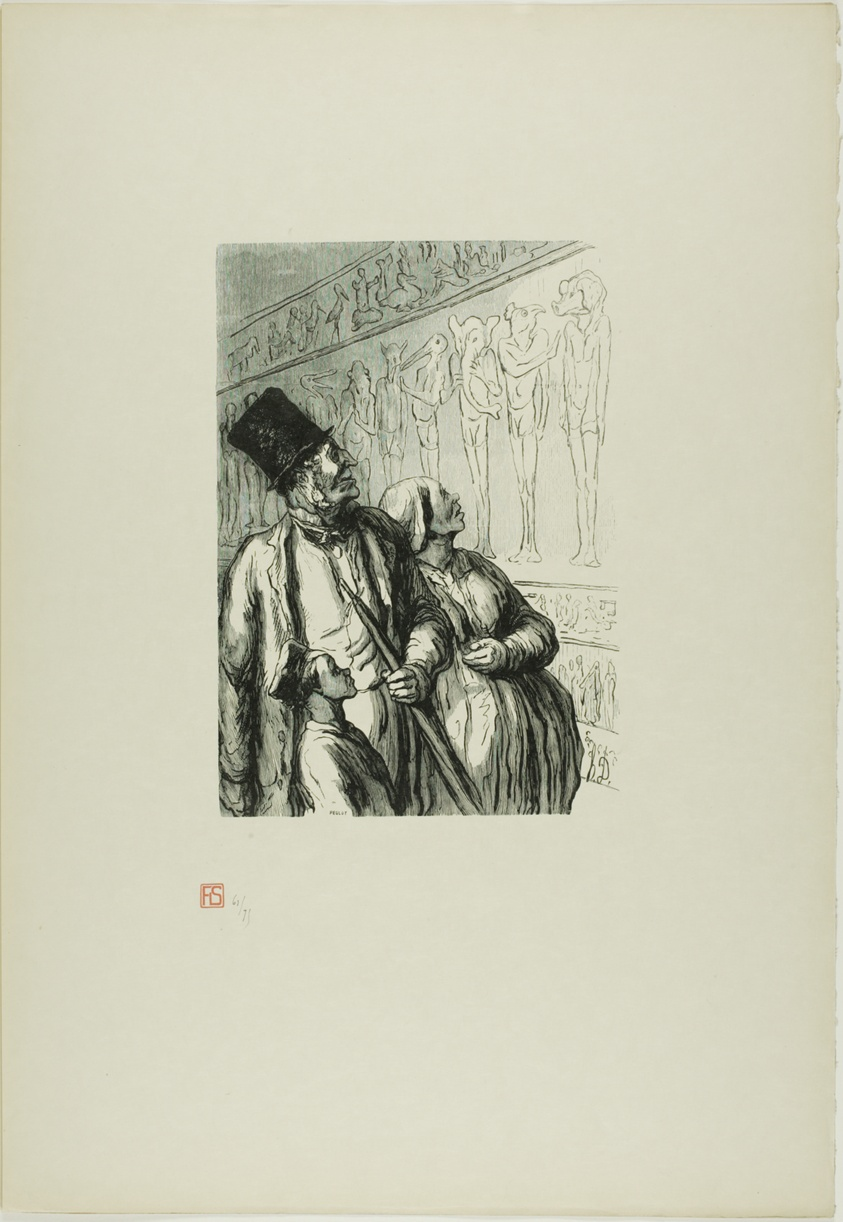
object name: Print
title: At the Universal Exposition: The Egyptian Section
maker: Julien Antoine Peulot (French, born 1827); after Honoré Victorin Daumier (French, 1808-1879); printed by François Louis Schmied (Swiss, 1873-1941); published by Jules Meynial (French, 20th century)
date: 1867, printed 1920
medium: Wood engraving on cream Japanese paper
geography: France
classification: wood engraving; print; prints and drawing